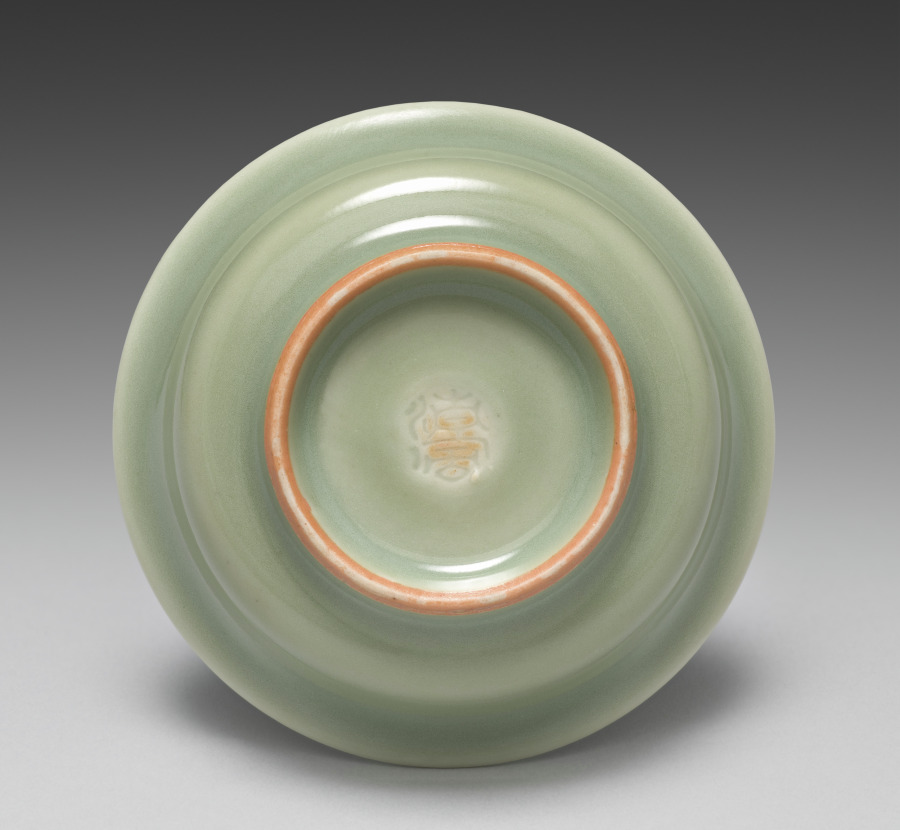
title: Saucer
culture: Japan, Meiji period (1868–1912)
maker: Seifū Yohei III (Japanese, 1851–1914)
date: 1893–1914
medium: One from a set of ten dishes; porcelain with green glaze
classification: Ceramic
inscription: 清風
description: Yohei III’s main output for his sophisticated clientele was in the form of tea sets and dining sets. He created a range of dishes in green glazes. He often produced in pairs, sets of five, or sets of ten. For this set of ten small dishes in a simple, round form that emphasizes the glaze above all, the box lid designates the piece as seiji, or green-glazed porcelain, using a general term for the extensive palette of green glazes often called celadon in English. The box lid further identifies the dishes themselves as tōchō, literally “bean-sized saucers,” a size that makes them suitable for dipping sauces.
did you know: The ten dishes in this set are stored in stacks of five in a two-compartment box.